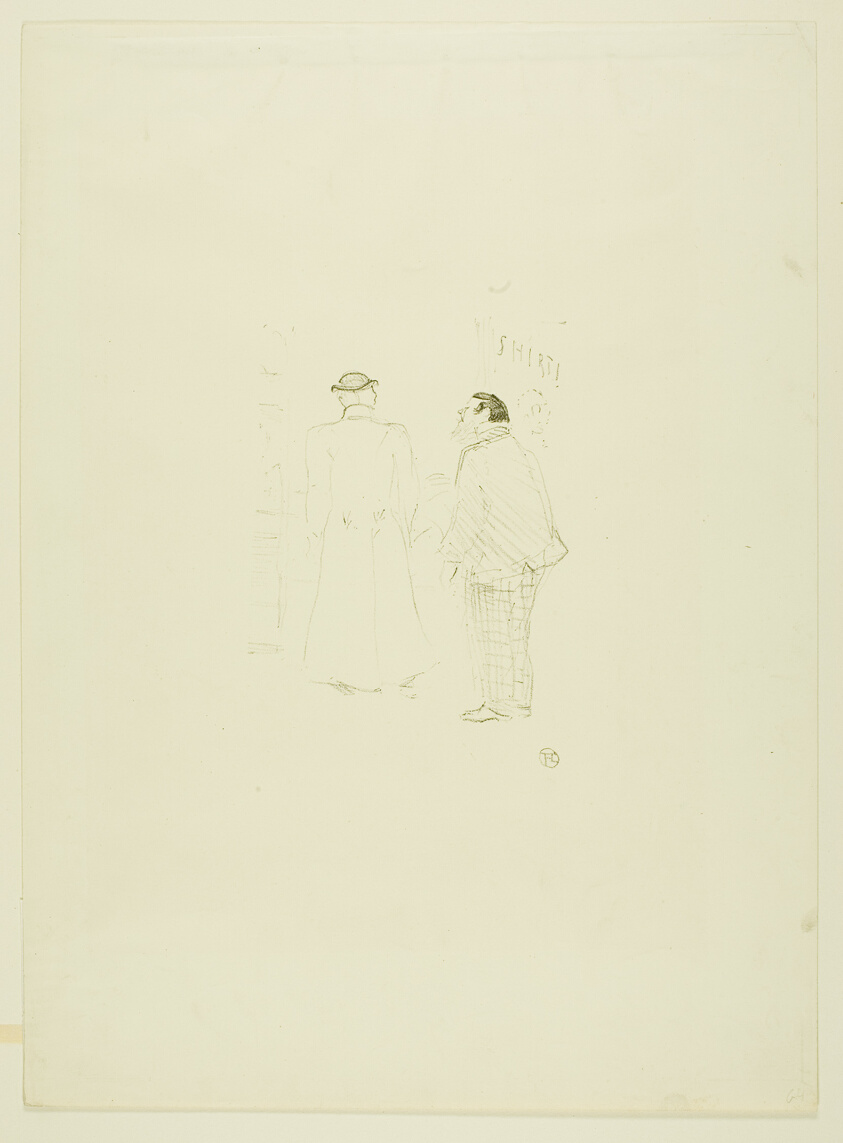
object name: Print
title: The Head Salesman at Jourdan and Brown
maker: Henri de Toulouse-Lautrec (French, 1864-1901)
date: 1897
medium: Color lithograph on ivory wove paper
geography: France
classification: lithograph; print; prints and drawing